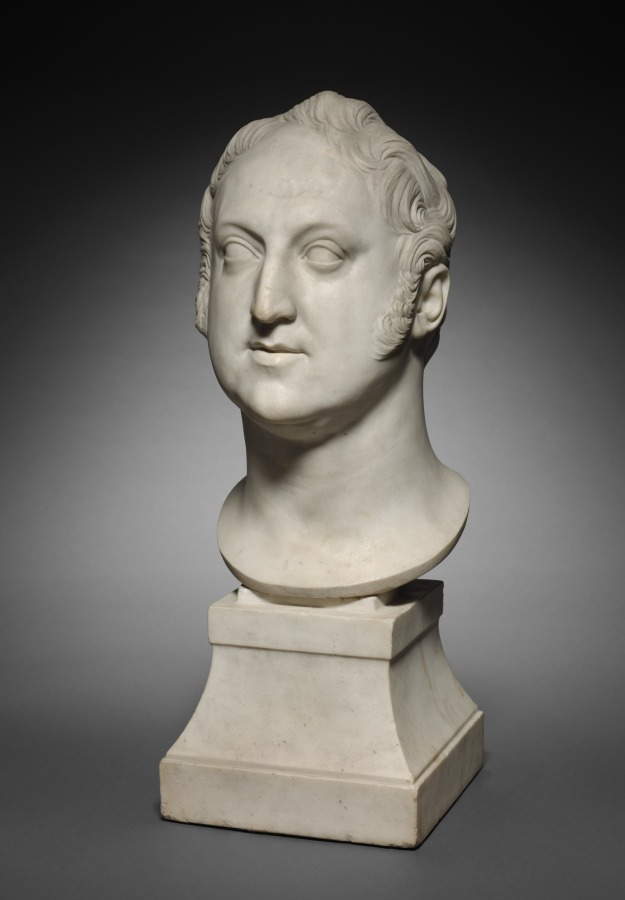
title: Bust of Rossini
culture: France, 19th century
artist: Pierre Jean David d'Angers (French, 1788–1856)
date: 1831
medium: marble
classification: Sculpture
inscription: inscribed at back of neck: A / Joachino Rossini de Pesaro / P.J. David d'Angers / 1831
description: Gioacchino Antonio Rossini (1792–1868) was a composer most famous for his comic operas. Although of Italian birth, much of Rossini's later life was spent in Paris, where he undoubtedly sat for this portrait for David d'Angers, whose ambition it was to sculpt portraits of all the famous people of his day.